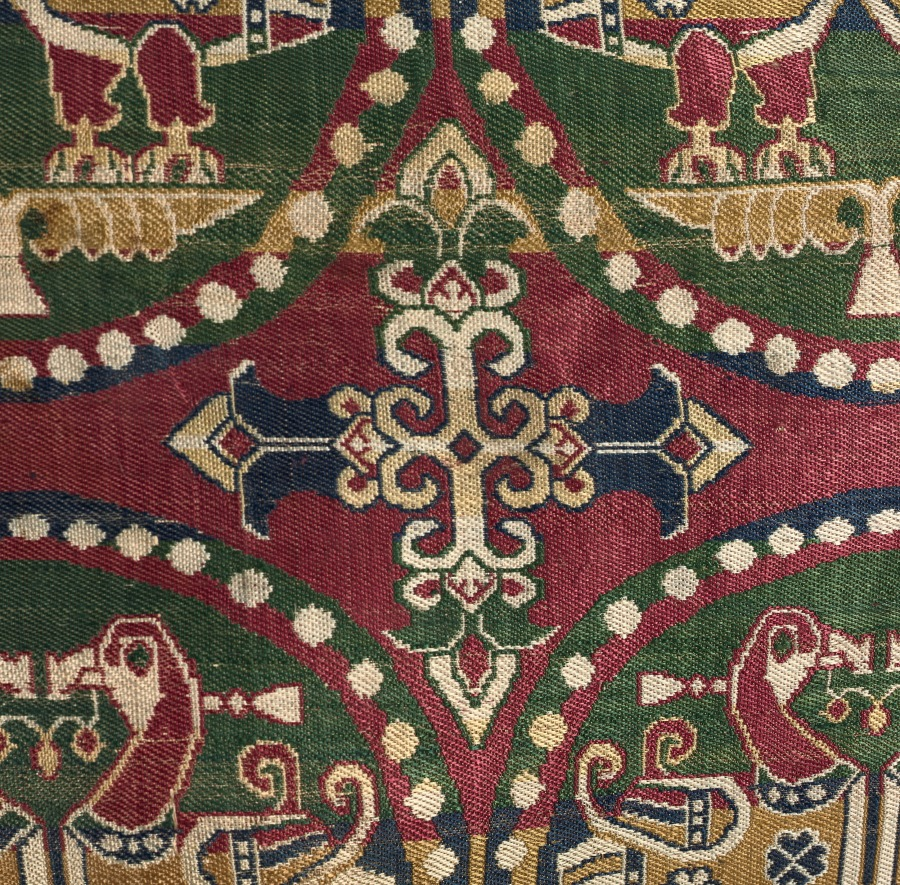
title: Child’s Coat with Ducks in Pearl Medallions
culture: Probably Sogdia (present-day Uzbekistan); China, Tang dynasty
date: 700s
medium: Silk: weft-faced compound twill weave (samite)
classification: Garment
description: The coat’s outer fabric is woven in five brilliant colors featuring paired ducks in pearl roundels, hallmarks of the precious and highly desired silks from Sogdia. The coat’s inner lining is a twill damask with a floral pattern made in China. The combination of Sogdian and Chinese silks in one garment with Tibetan ownership history is evidence of the vital exchange and cultural interaction among the peoples living along the trade routes of the Silk Road. This precious coat was presumably made for a Tibetan prince. Given the coat’s pristine condition, though, it is unclear whether the garment was ever worn, or was used as a diplomatic gift or perhaps as currency.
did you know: This coat is part of a set of garments that originally included an outer pair of pants and silk boots made from the same fabric.